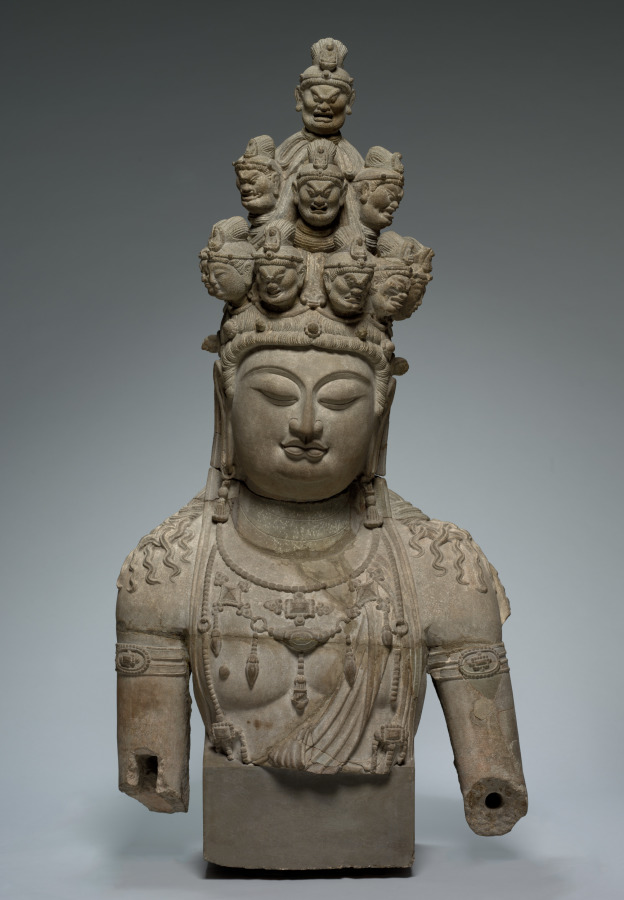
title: Eleven-Headed Guanyin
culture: China, Tang dynasty (618-907)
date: early 700s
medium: gray sandstone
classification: Sculpture